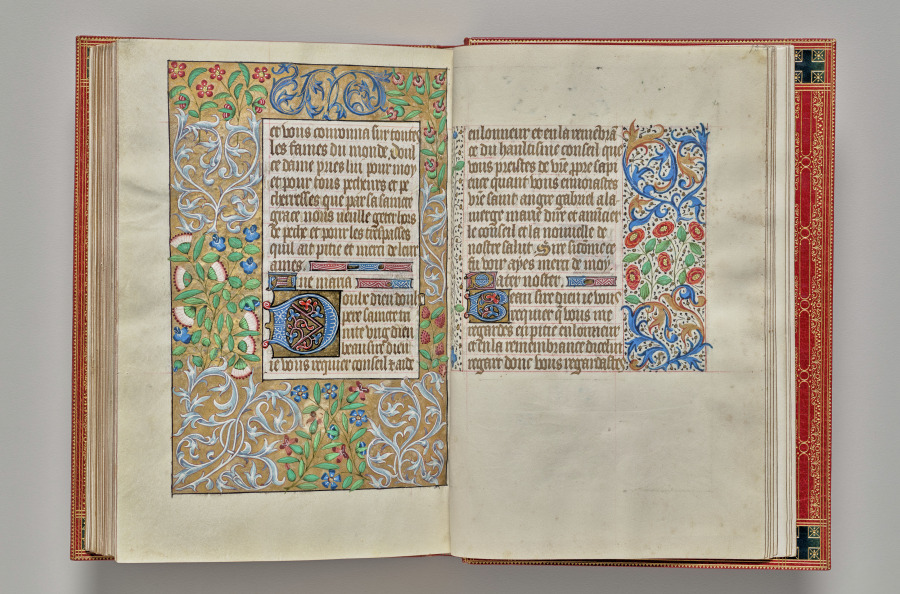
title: Book of Hours (Use of Rouen): fol. 151v, Elaborate Border of Foliage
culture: France, Rouen, 15th century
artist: Master of the Geneva Latini (French, active Rouen, 1460–80)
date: c. 1470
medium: ink, tempera, and gold on vellum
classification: Bound Volume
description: In the late 1400s and early 1500s Rouen was an established and important center of book production. The city’s cathedral had a wealthy chapter that spent large sums of money to commission books and to maintain its extensive library. The stationers and booksellers would have likely been concentrated in or near the cathedral precinct. This artist, named after a manuscript now in Geneva, was Rouen’s principal illuminator during the second half of the 1400s.